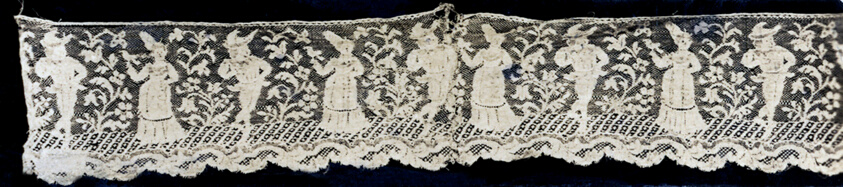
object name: Textile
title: Two Borders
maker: France, probably Calais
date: c. 1890s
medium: Cotton, linen, and silk, Leavers machine lace, an imitation of a bobbin lace known as "Mechlin"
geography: France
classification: textile; lace - machine